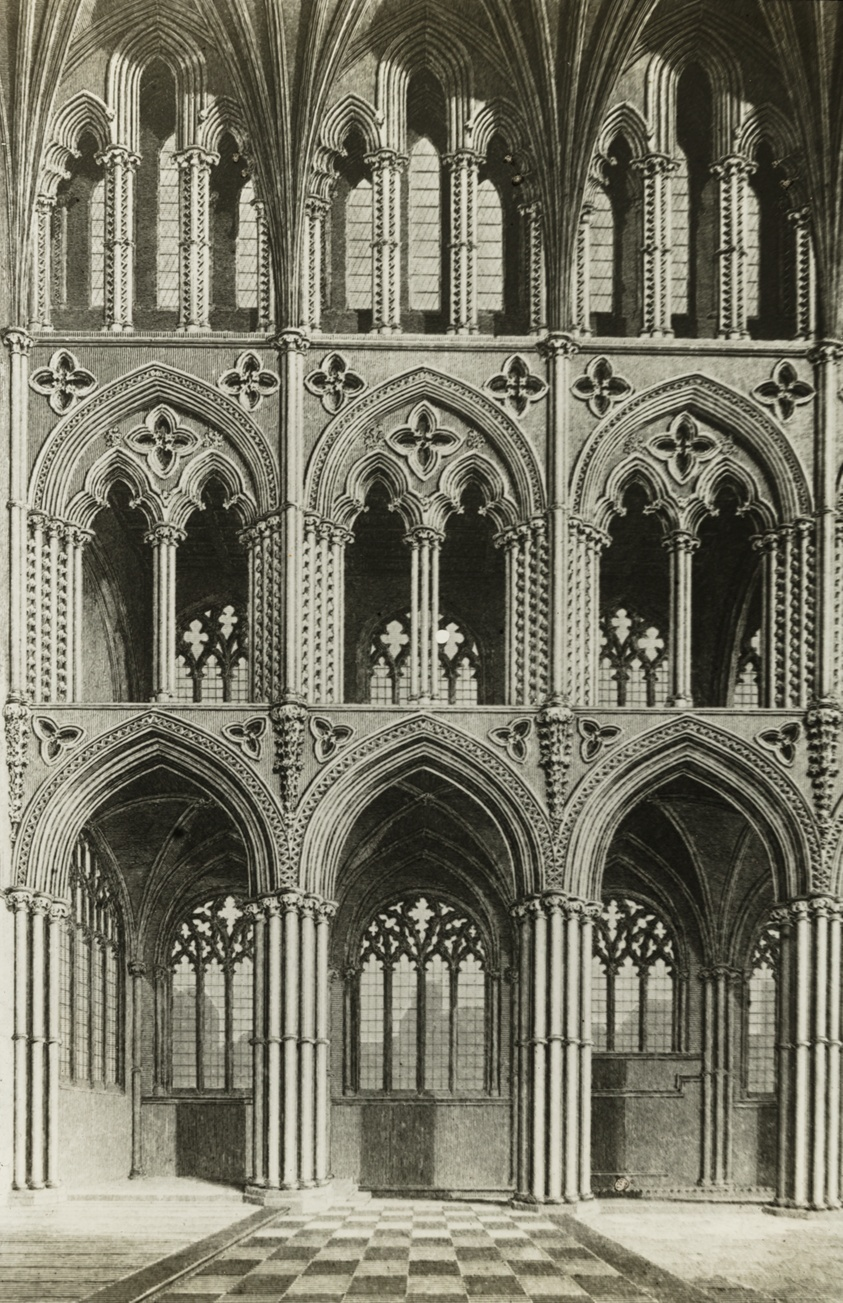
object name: Photograph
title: Ely Cathedral: Presbytery, from an Engraving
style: Pictorialism, 19th century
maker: Frederick H. Evans (English, 1853–1943)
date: c. 1891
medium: Lantern slide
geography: England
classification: photograph; photography